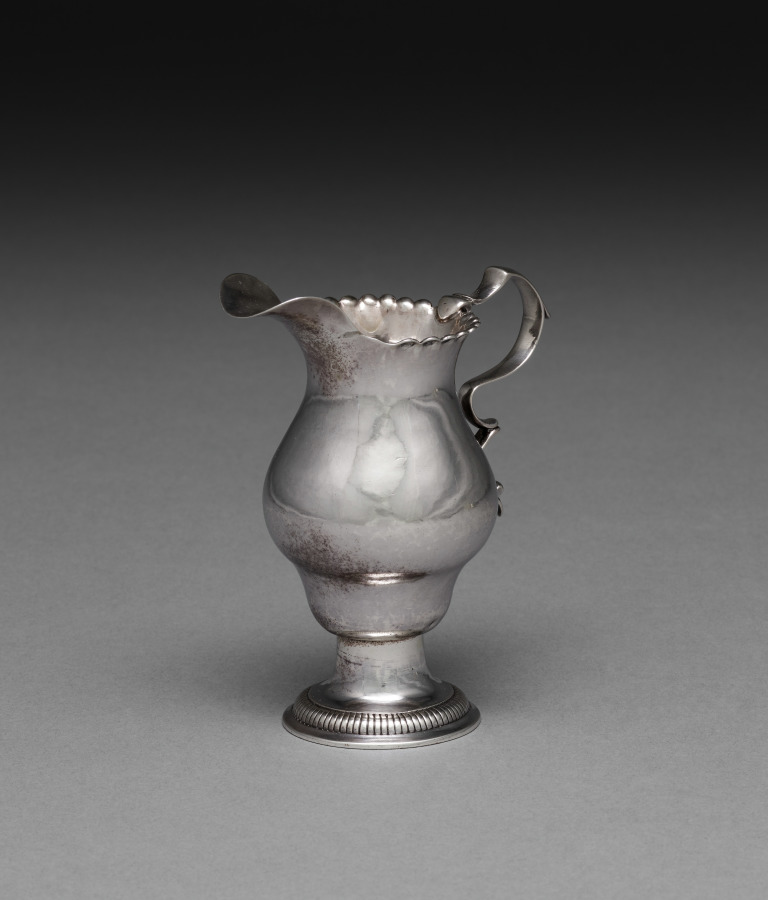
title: Cream Jug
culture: America, Massachusetts, Boston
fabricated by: John Coburn (American, 1725–1803)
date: c. 1780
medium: silver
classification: Silver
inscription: engraved: "W" over "A + E" in block letters on handle, below grip.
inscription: Stamped underside: "I.Coburn"